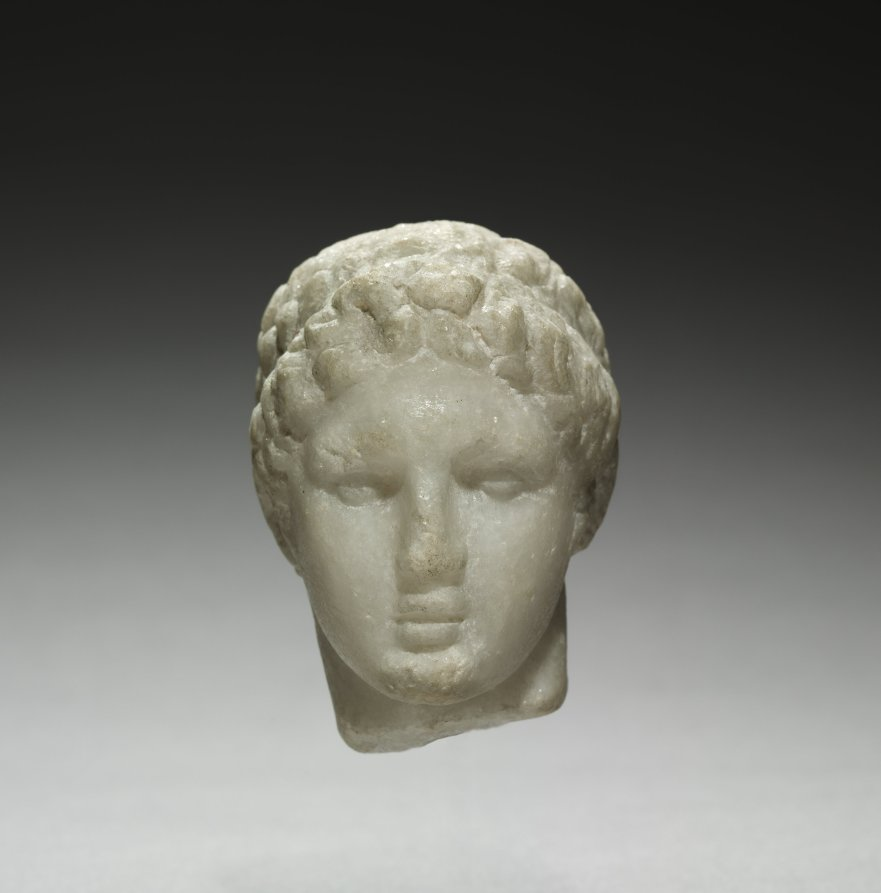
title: Head of a Man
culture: Greece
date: 200s BCE?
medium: marble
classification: Sculpture